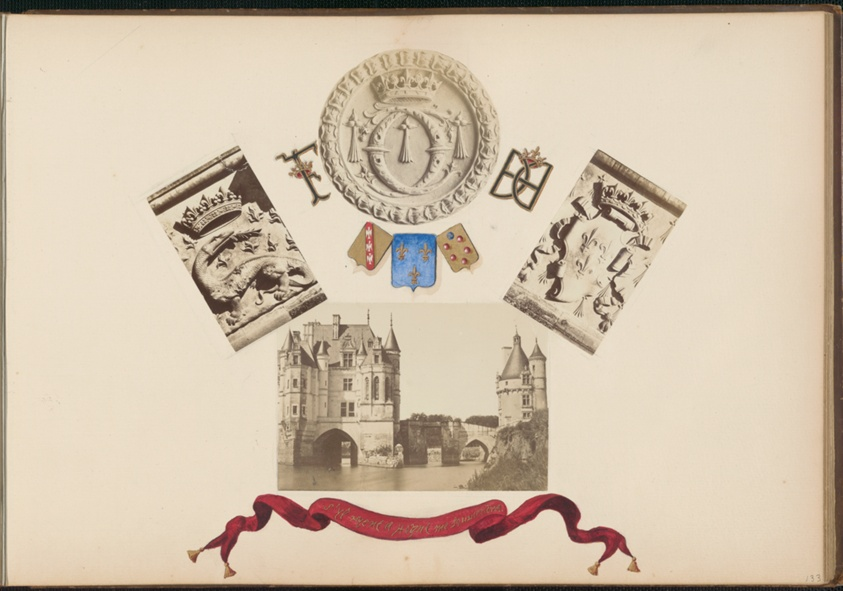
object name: Photograph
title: The Madame B Album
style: 19th century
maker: Marie-Blanche Hennelle Fournier (French, 1831–1906)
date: 1870s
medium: Albumen prints with watercolor (in album)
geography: France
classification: photograph; albumen silver print; photography